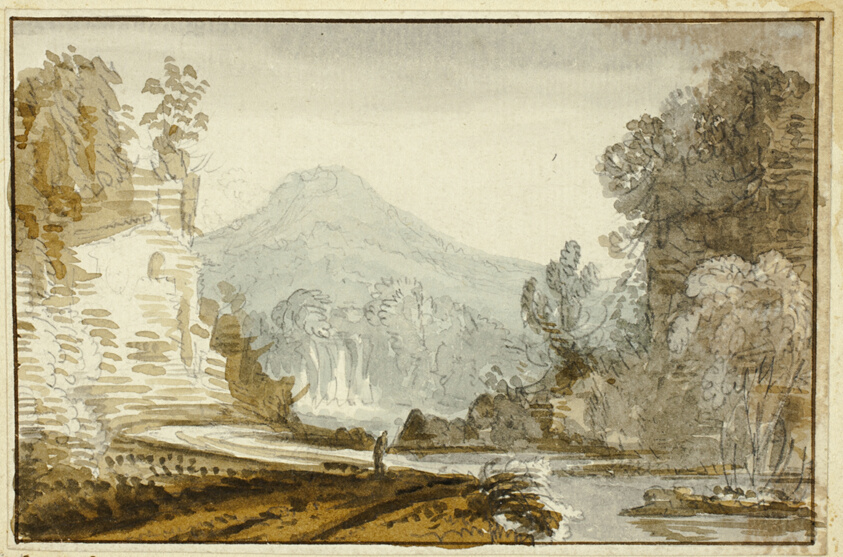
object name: Drawing and Watercolor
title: Figure of River below Cliff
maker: Attributed to Jean Baptiste Claude Chatelain (French, c. 1710-c. 1771); or the style of Paul Sandby (English, 1725-1809)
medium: Watercolor over graphite, on ivory laid paper, laid down on cream laid paper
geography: France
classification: watercolor; drawings (visual works); prints and drawing